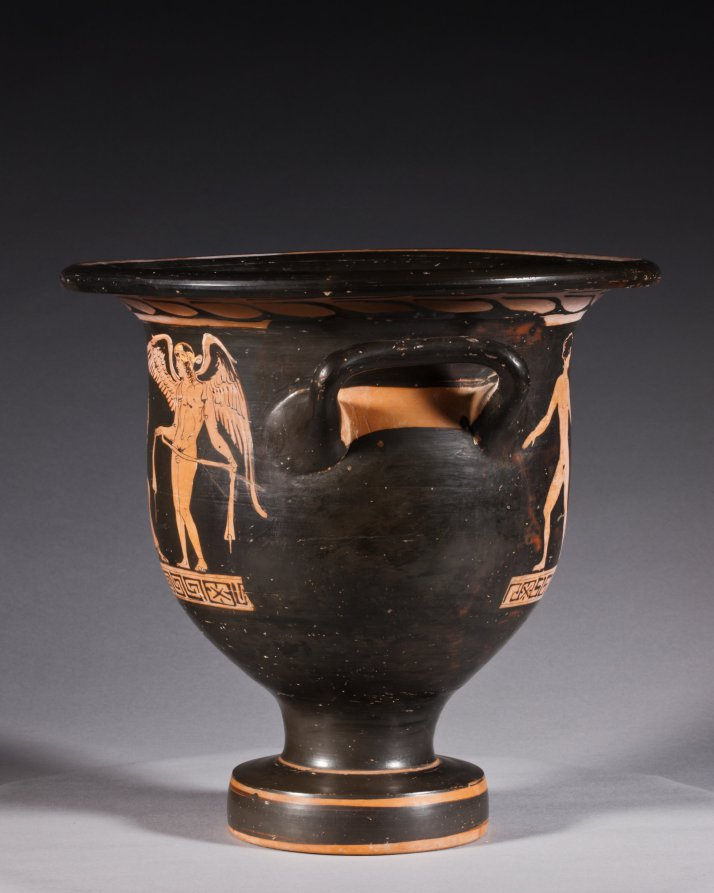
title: Red-Figure Bell Krater (Mixing Vessel): Aphrodite and Eros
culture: South Italian, Apulian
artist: attributed to Graz Painter (South Italian, Apulian, active c. 380–360 BCE)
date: c. 370–360 BCE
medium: ceramic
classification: Ceramic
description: This small mixing vessel shows a finely dressed woman seated on a chest and holding up a mirror to admire herself. Before her stands Eros, the winged god of love, holding a ribbon or sash. Behind the woman stands a pillar with the inscription ΑΦΡΟΔΙΤΗ, or APHRODITE, the goddess of love. Such labels are rare on vases, and scholars debate whether this names the woman shown as Aphrodite herself, with her son Eros, or a bride envisioning herself as Aphrodite, just before her wedding.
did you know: The dancing nude youths on the reverse are unusual; typically they would be standing and draped.